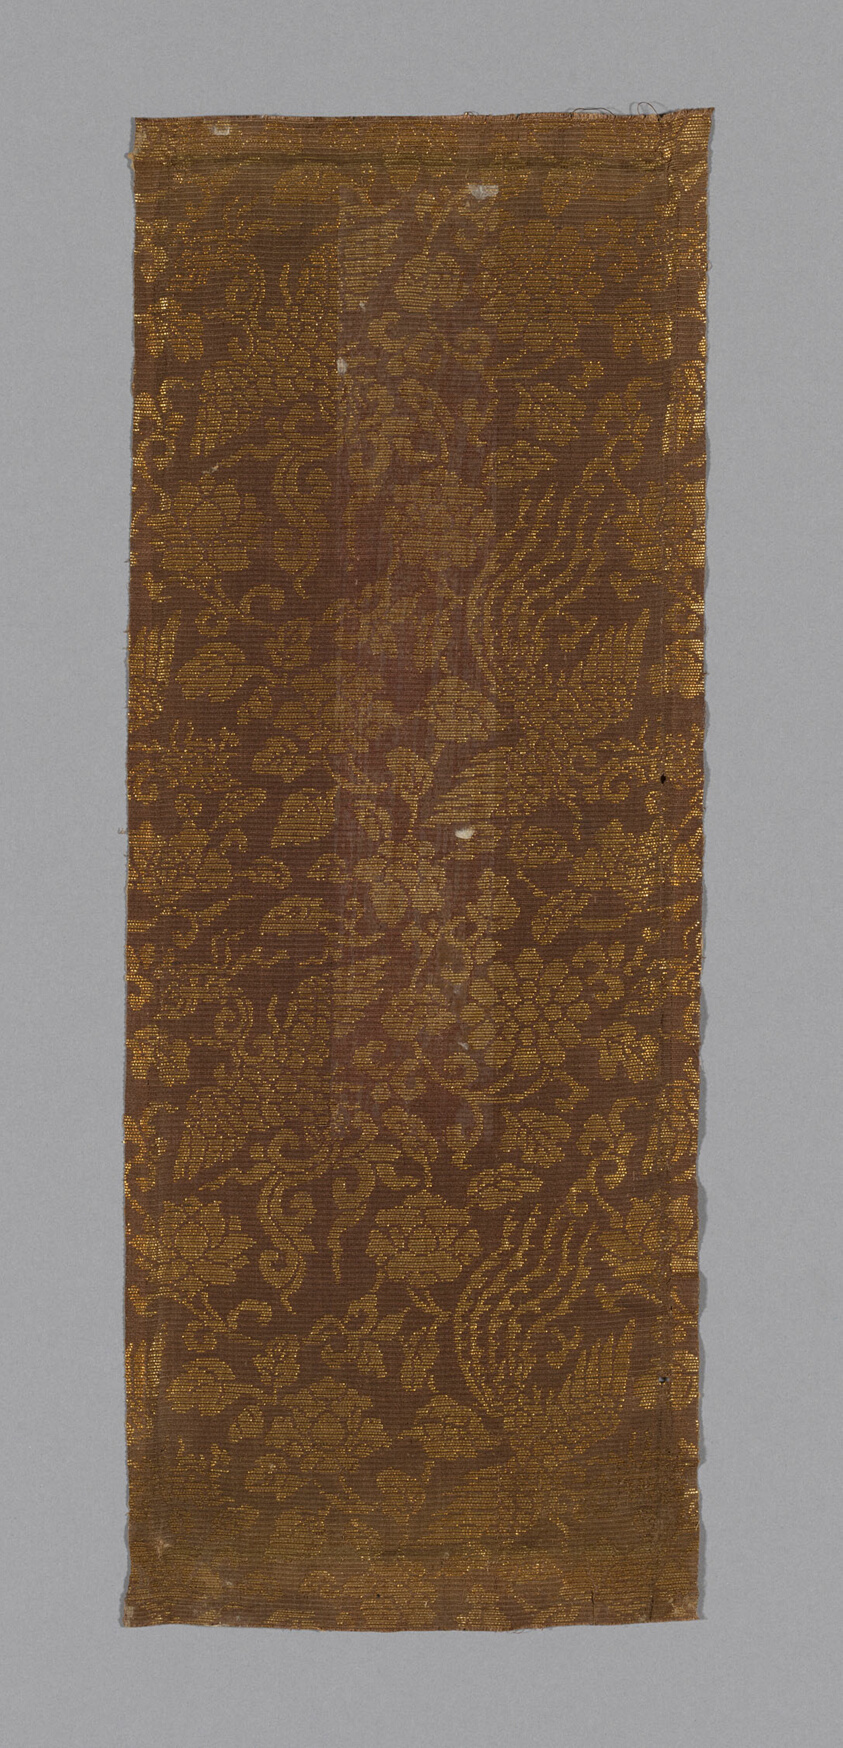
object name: Textile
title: Sutra Cover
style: ming, Chinese (culture or style), East Asian, asian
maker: China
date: Ming dynasty (1368–1644), c. 1590's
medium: Silk and gold-leaf-over-lacquered-paper strip, gauze weave with supplementary patterning wefts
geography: China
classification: textile; weaving